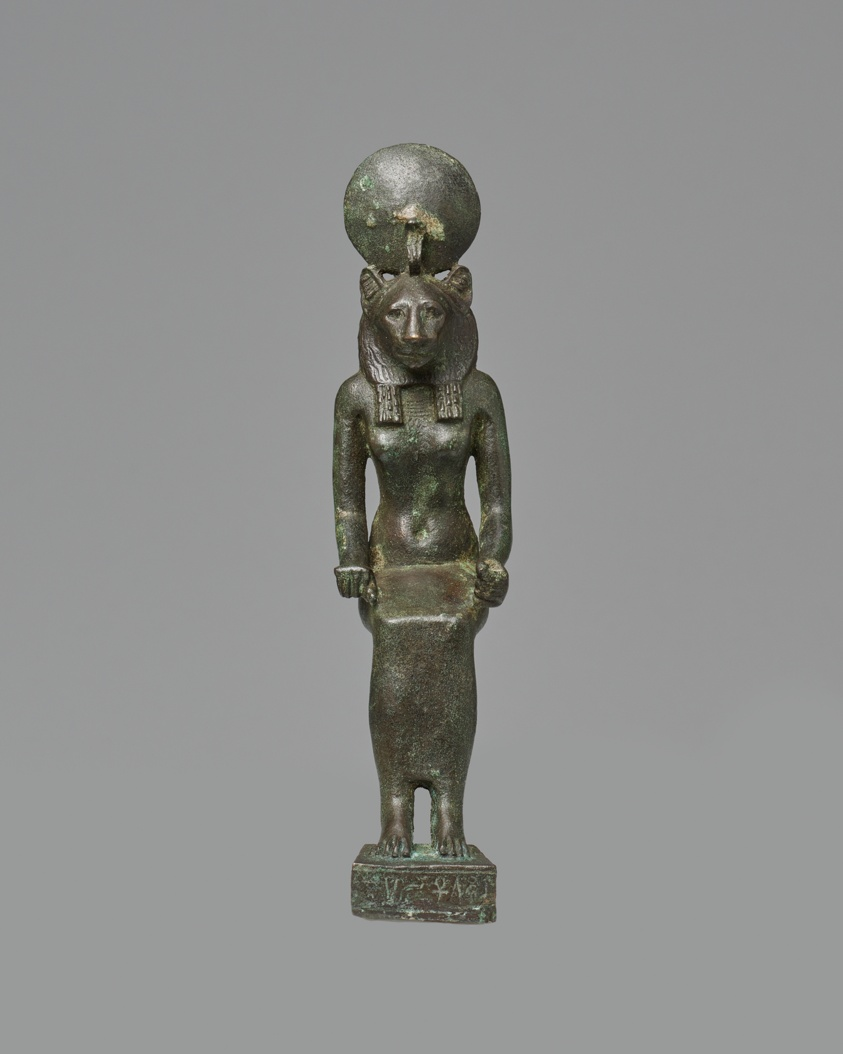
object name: Sculpture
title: Statuette of Wadjet or Sekhmet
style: late period (egyptian), egyptian, ancient, twenty-sixth dynasty, saite period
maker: Egyptian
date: Late Period, Dynasty 26 (664–525 BCE)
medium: Copper alloy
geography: Egypt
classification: statuette; bronze; metal; sculpture; ancient art; votive offering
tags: goddesses, animals, lions